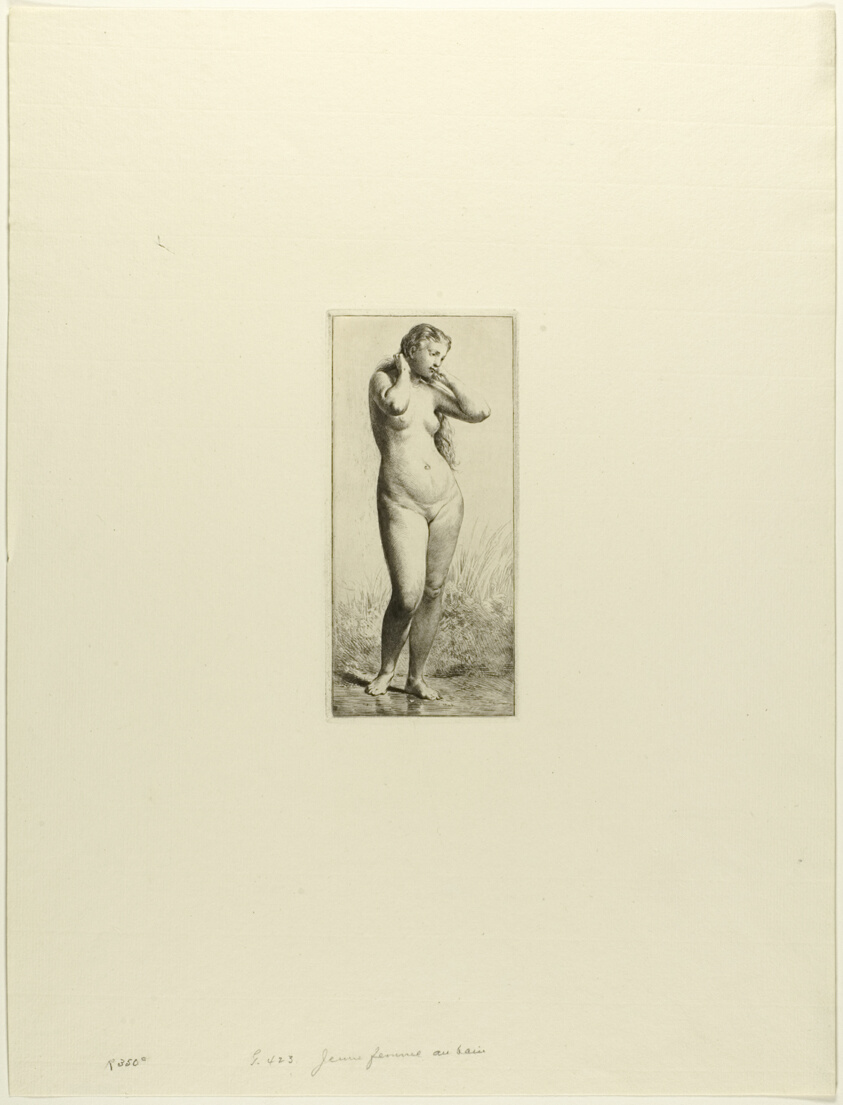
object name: Print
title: Young Woman Bathing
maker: Charles Émile Jacque (French, 1813-1894)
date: c. 1866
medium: Etching, drypoint and roulette on ivory laid paper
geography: France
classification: etching; print; prints and drawing